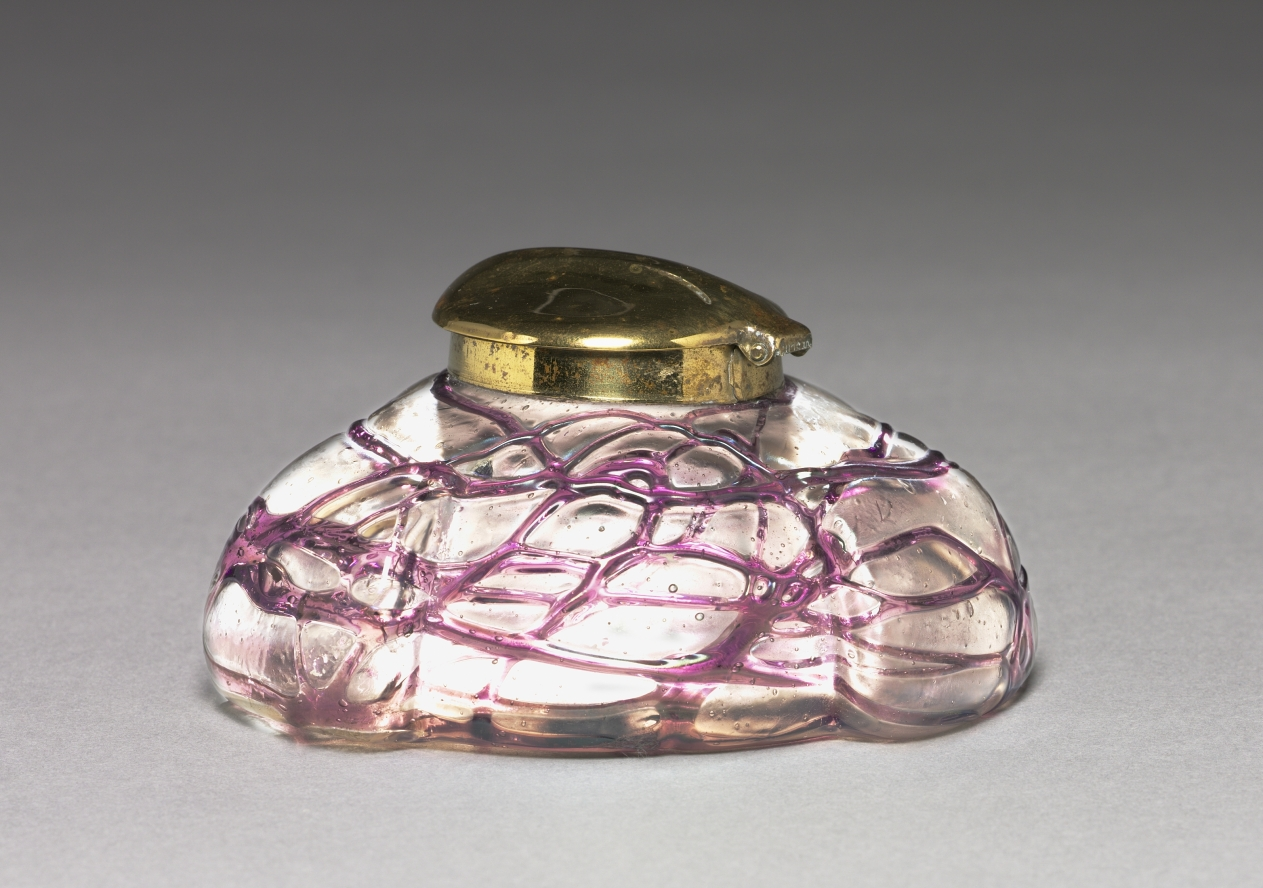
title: Inkwell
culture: Czechoslovakia, late 19th century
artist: Pallme-König & Habel (Czech)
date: c. 1899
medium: glass with bronze mount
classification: Glass